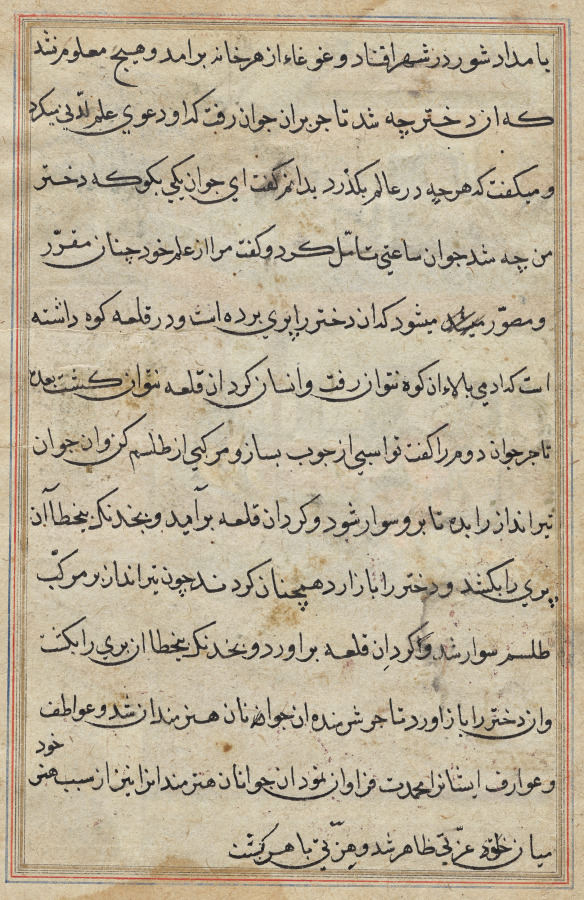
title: Page from Tales of a Parrot (Tuti-nama): text page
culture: Mughal India, court of Akbar (reigned 1556–1605)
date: c. 1560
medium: gum tempera, ink, and gold on paper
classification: Painting